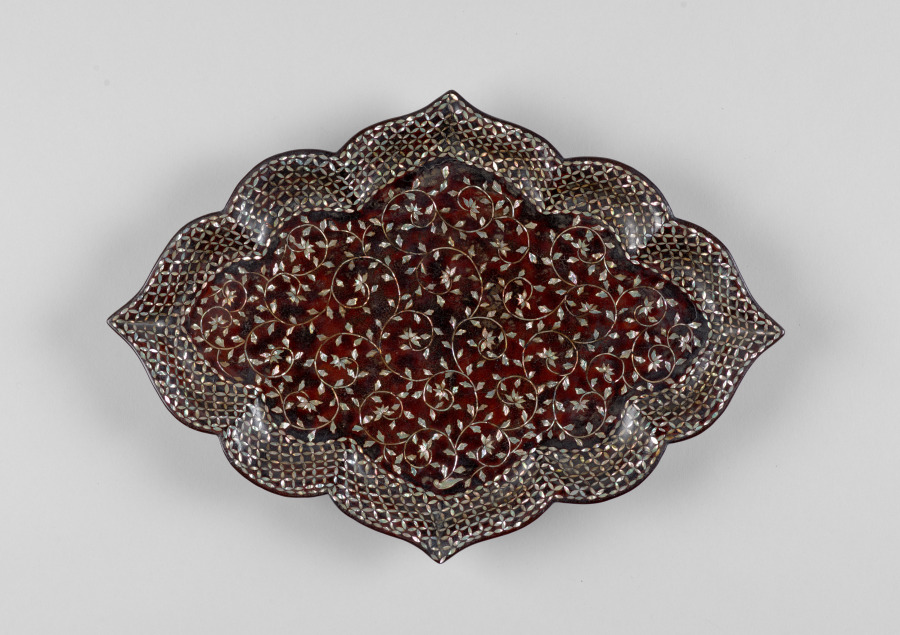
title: Foliate-Shaped Tray with Mother-of-Pearl Inlay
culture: Korea, Joseon dynasty (1392–1910)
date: late 1400s–early 1500s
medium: Inlaid abalone shells on black lacquer ground, applied with red lacquer on the interior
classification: Lacquer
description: Since the Goryeo dynasty, Korean mother-of-pearl lacquerware has been admired for its refinement, though few early examples survive. This tray, datable to the late 1400s or early 1500s, is exceptional for both rarity and condition. Its foliate form, peony vine motif, and intricate lattice border—originally derived from Goryeo-period decorative arts—are exquisitely reinterpreted through the refined craftsmanship of early Joseon artisans.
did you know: This tray’s intricately decorated surface was created through a labor-intensive inlay technique employing thin, precisely cut abalone shell.